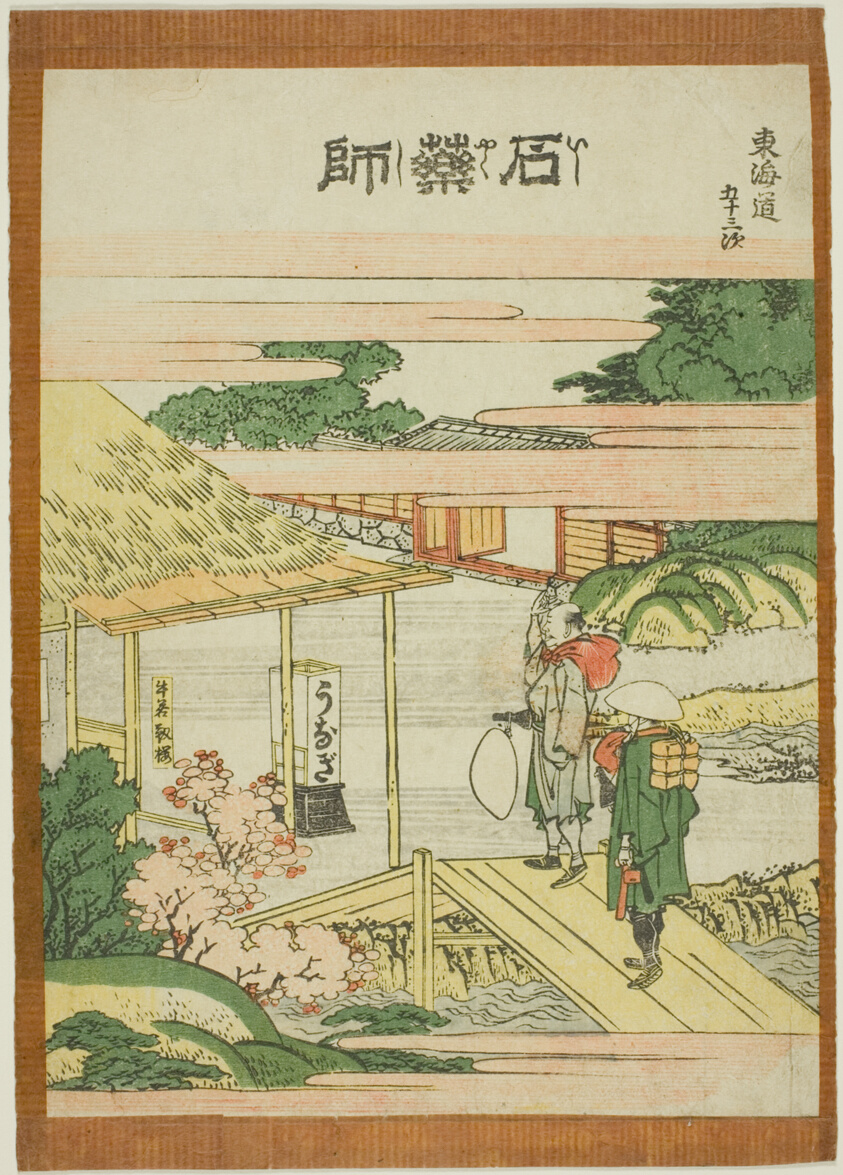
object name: Print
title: Ishi yakushi, from the series "Fifty-three Stations of the Tokaido (Tokaido gojusan tsugi)"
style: Japanese (culture or style)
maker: Katsushika Hokusai 葛飾 北斎; Japanese, 1760-1849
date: c. 1806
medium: Color woodblock print; chuban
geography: Japan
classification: woodblock print; print; asian art